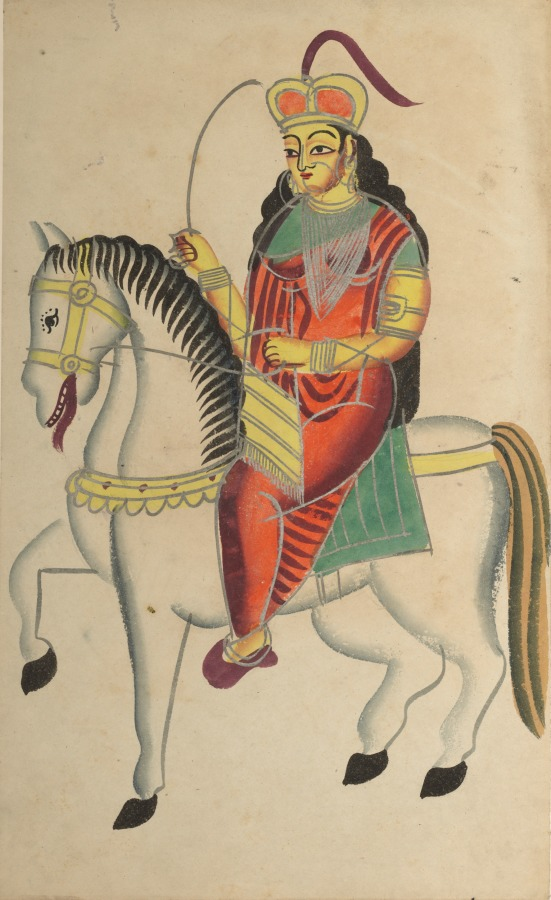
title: The Mutiny of the Heroine Rani Lakshmi Bai of Jhansi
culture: Eastern India, Bengal, Kolkata, Kalighat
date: c. 1890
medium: Gum tempera, graphite, ink, and tin on paper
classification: Painting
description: Rani Lakshmi Bai was a widow of Raja Gangadhar Rao, the Maharaja of Jhansi, whose state had been annexed by the British. On June 10, 1857, following a massacre of Europeans by local Indian troops, she was proclaimed ruler. One of the first freedom fighters, she resisted the British and was killed in June 1858. She later became a legendary mutiny heroine and an icon for the Indian independence movement. In this image she wears a British crown and has her sword raised.